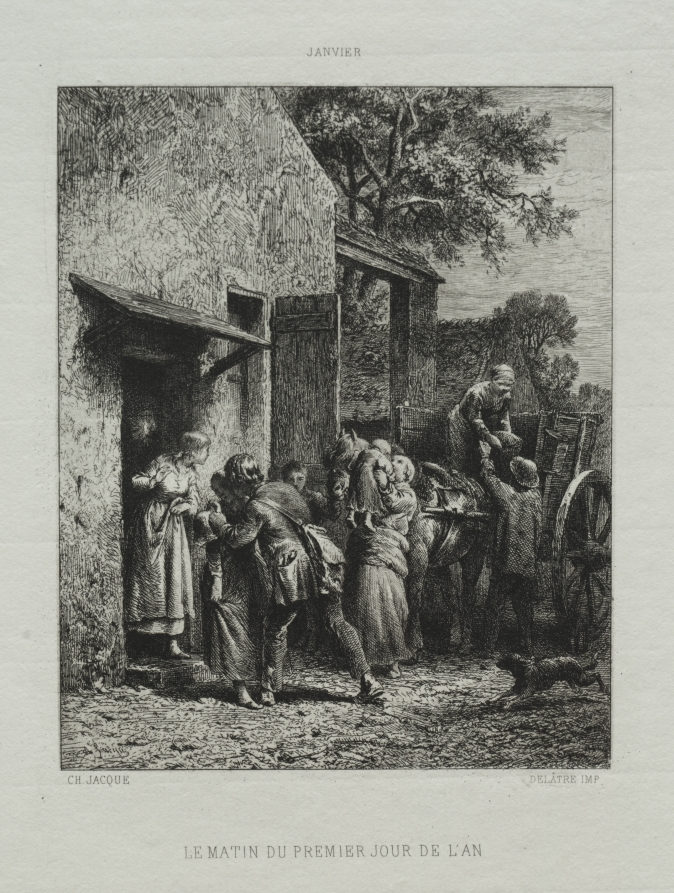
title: Le Matin du premier jour de l'an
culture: France, 19th century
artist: Charles-Émile Jacque (French, 1813–1894)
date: 1865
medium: etching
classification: Print